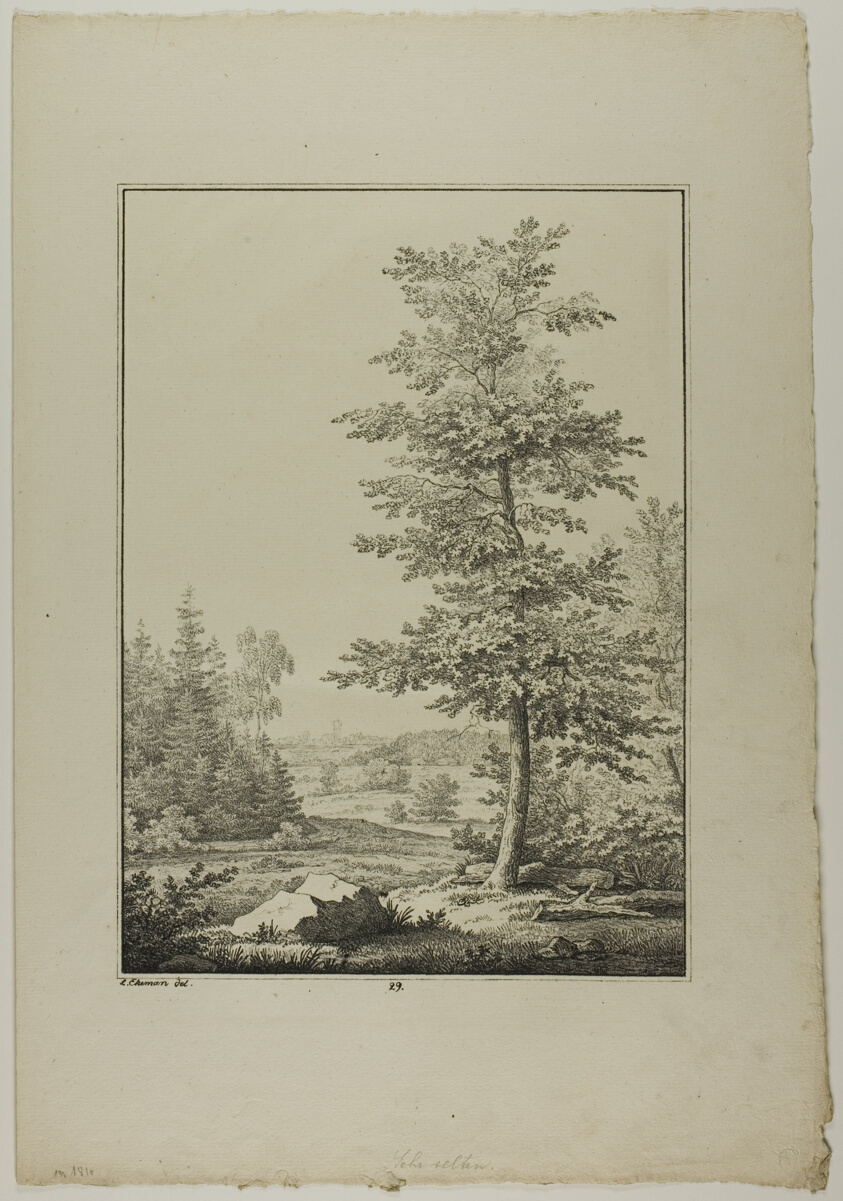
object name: Print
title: Plate 29 from Blatt Baum und Landschafts Studien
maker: Lorenz Ekemann Alesson (Swedish, 1791-1828)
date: c. 1810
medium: Lithograph on paper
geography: Sweden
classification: lithograph; print; prints and drawing